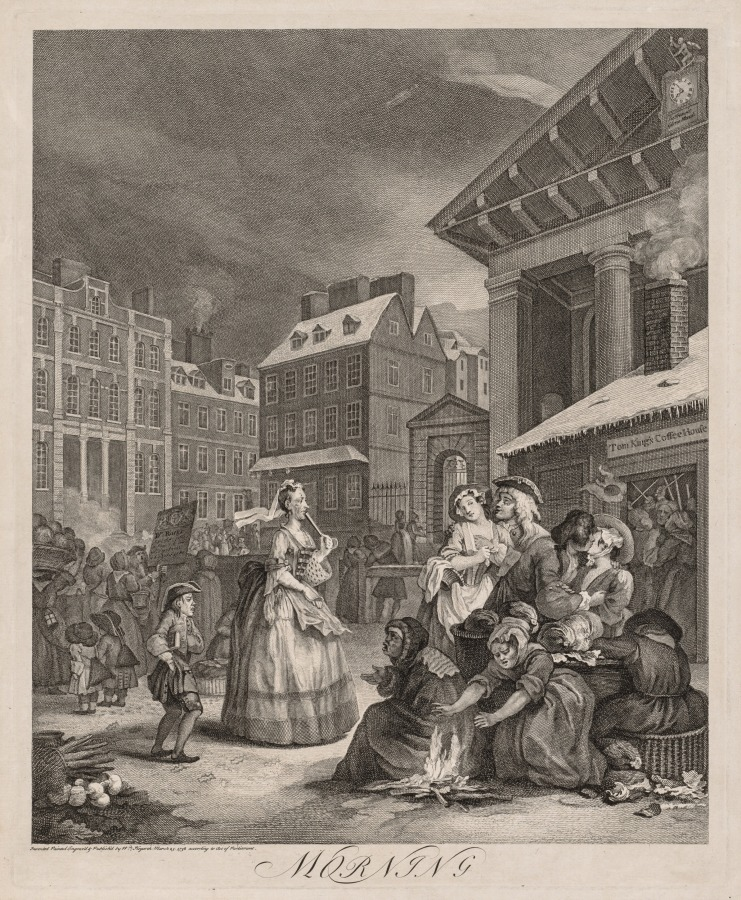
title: The Four Times of Day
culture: England, 18th century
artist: William Hogarth (British, 1697–1764)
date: 1738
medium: engraving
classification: Print